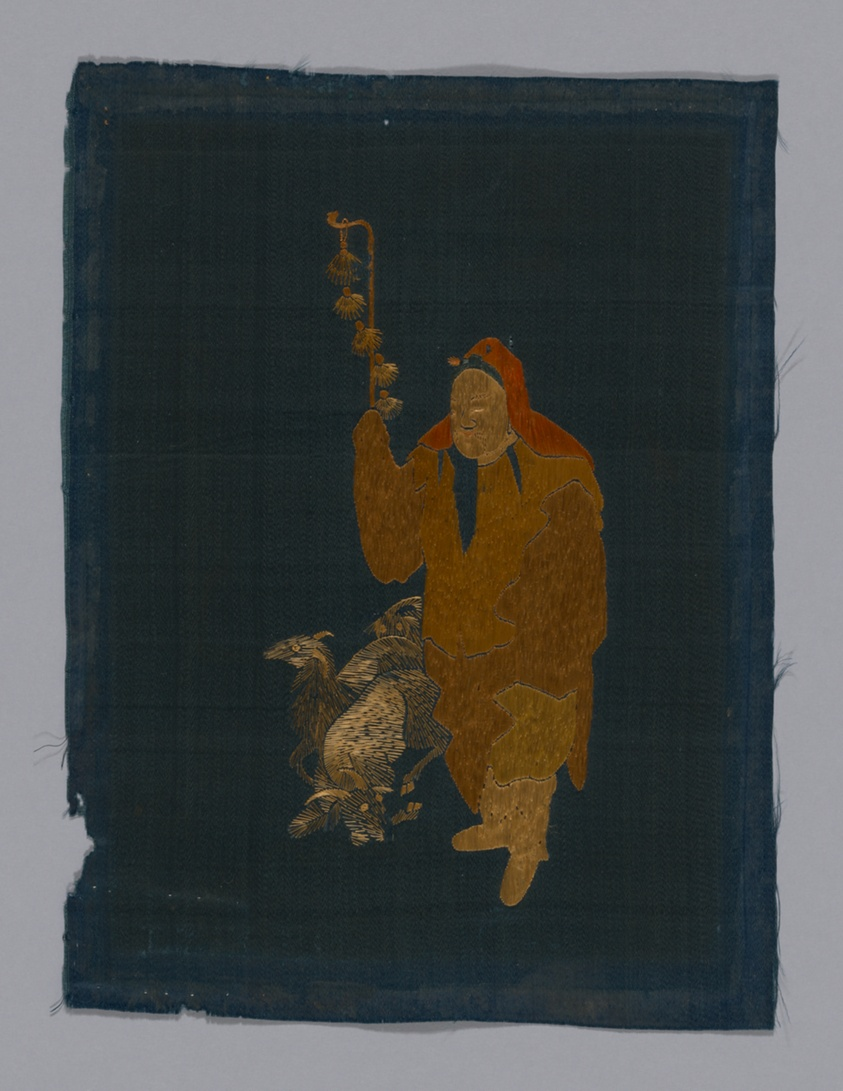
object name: Textile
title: Panel (Furnishing Fabric)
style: kangxi, qing, Chinese (culture or style), East Asian, asian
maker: China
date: Kangxi Period, Qing dynasty (1644–1911), 1800/50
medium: One of four panels. Of dark green satin embroidered in colored silks. Has two panels of figures and one of flowers. Borders of modern red cloth with design of fret in couched gold cord.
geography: China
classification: textile; needlework (visual works); weaving; furnishing textile